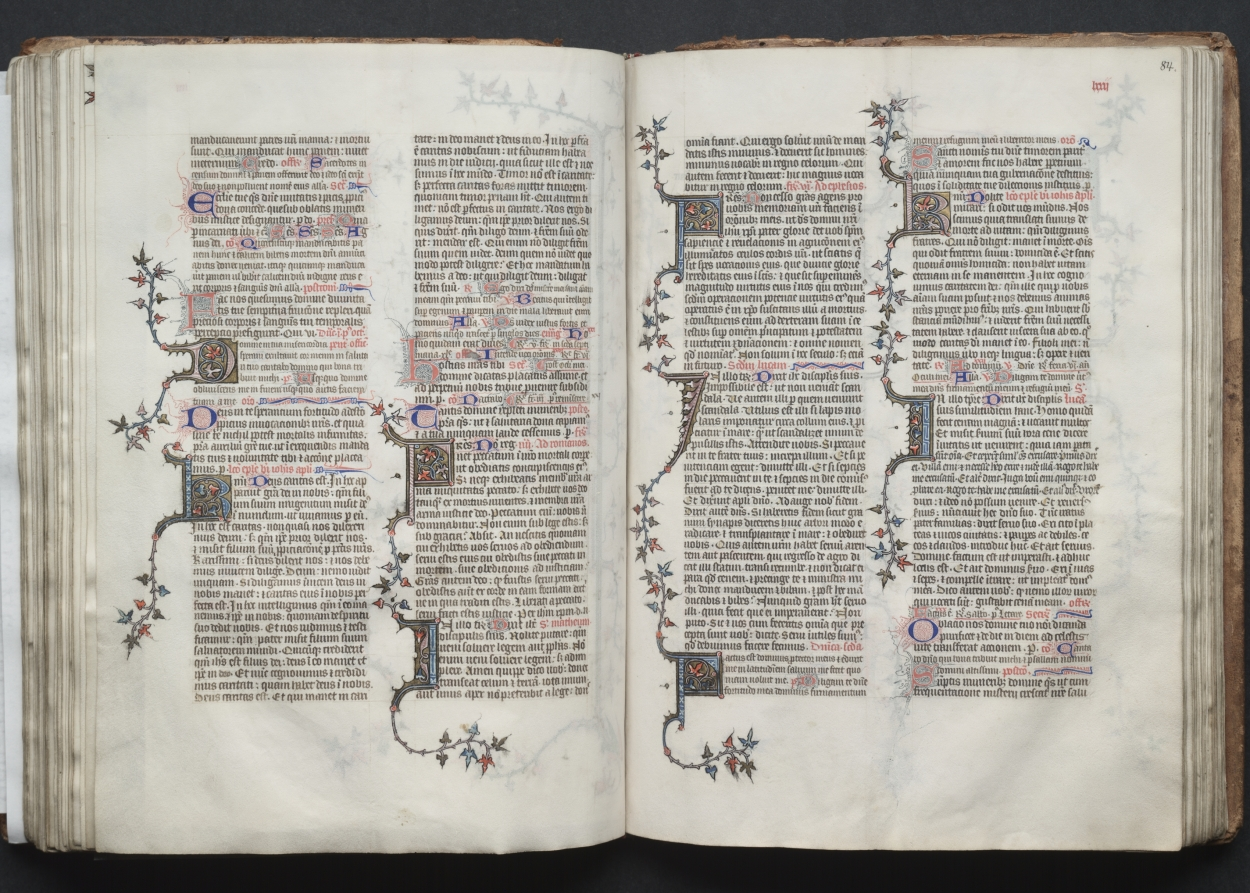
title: The Gotha Missal: Fol. 83v, Text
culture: France, Paris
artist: Master of the Boqueteaux (French)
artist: and Workshop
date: c. 1375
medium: ink, tempera, and gold on vellum; blind-tooled leather binding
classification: Bound Volume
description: The style and quality of this manuscript's decoration is typical of deluxe Parisian books made for aristocratic or royal patrons. Most of the book's decoration appears to be the work of the Master of the Boqueteaux, an artist active at the court of King Charles V (died 1380). His style was apparently shared by a number of book illuminators working in and around Paris. It is very possible that the Gotha Missal belonged to Charles V, but is not provable because the manuscript has no royal portraits and lacks a colophon. Given the book's magnificent decoration, however, it would seem that it was produced for a Valois prince, if not for the king himself. The manuscript receives its name from the German dukes of Gotha, its later owners.